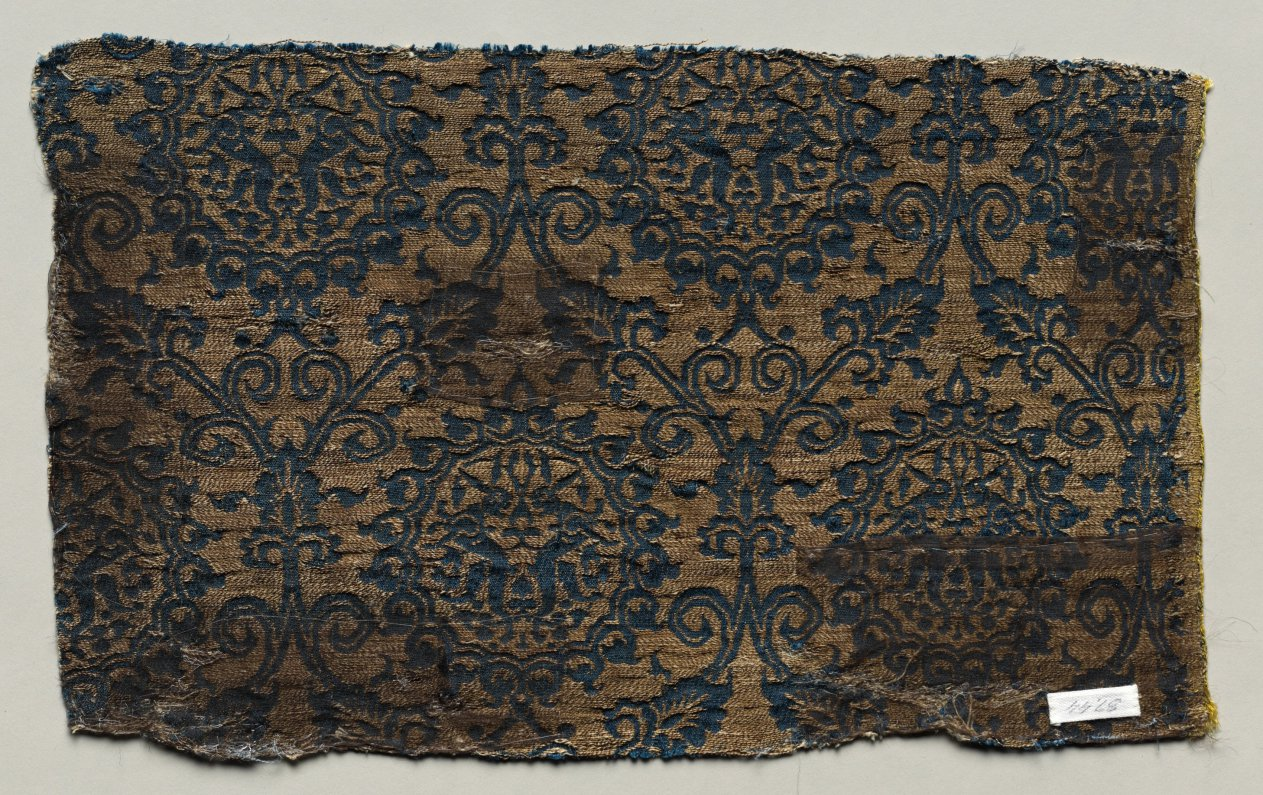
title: Lampas with hares in ogival pattern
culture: probably Iran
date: 1300s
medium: lampas: silk and gold thread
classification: Textile